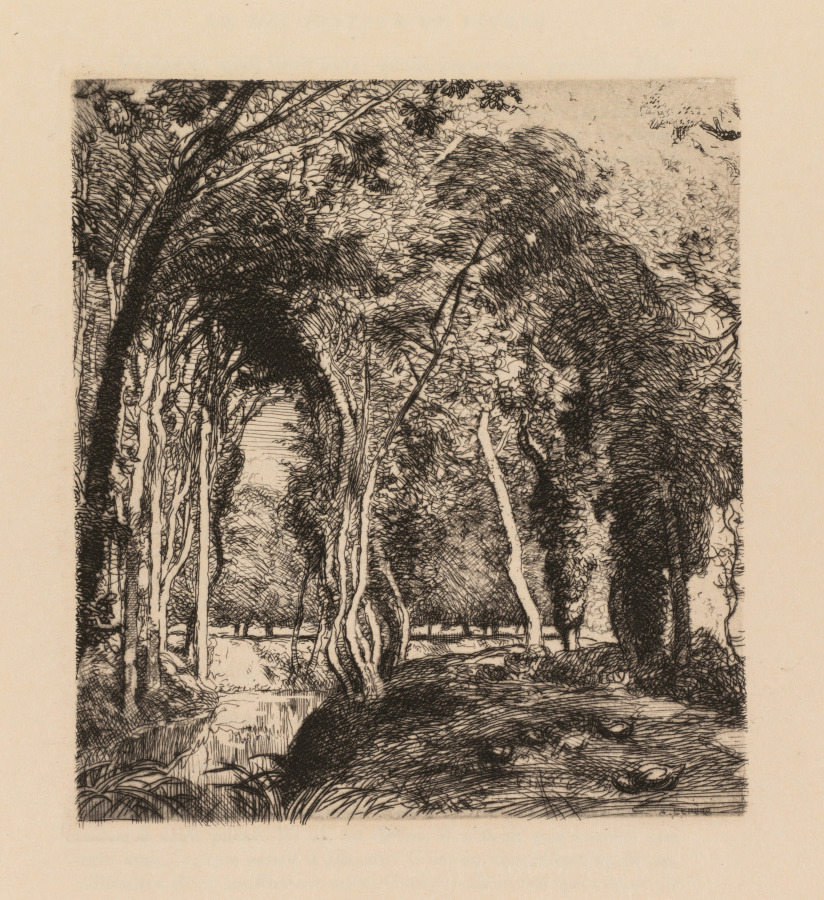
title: Auguste Lepère: Sous bois, à la Rigonette (Vendèe)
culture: France, 20th century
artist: Auguste Louis Lepère (French, 1849–1918)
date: 1931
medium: Etching, from bound volume with seven etchings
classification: Bound Volume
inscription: On tissue guard, lower right: 386. SOUS-BOIS A LA RIGONETTE (VENDÉE); On plate, within image, lower left margin: A. Lepère